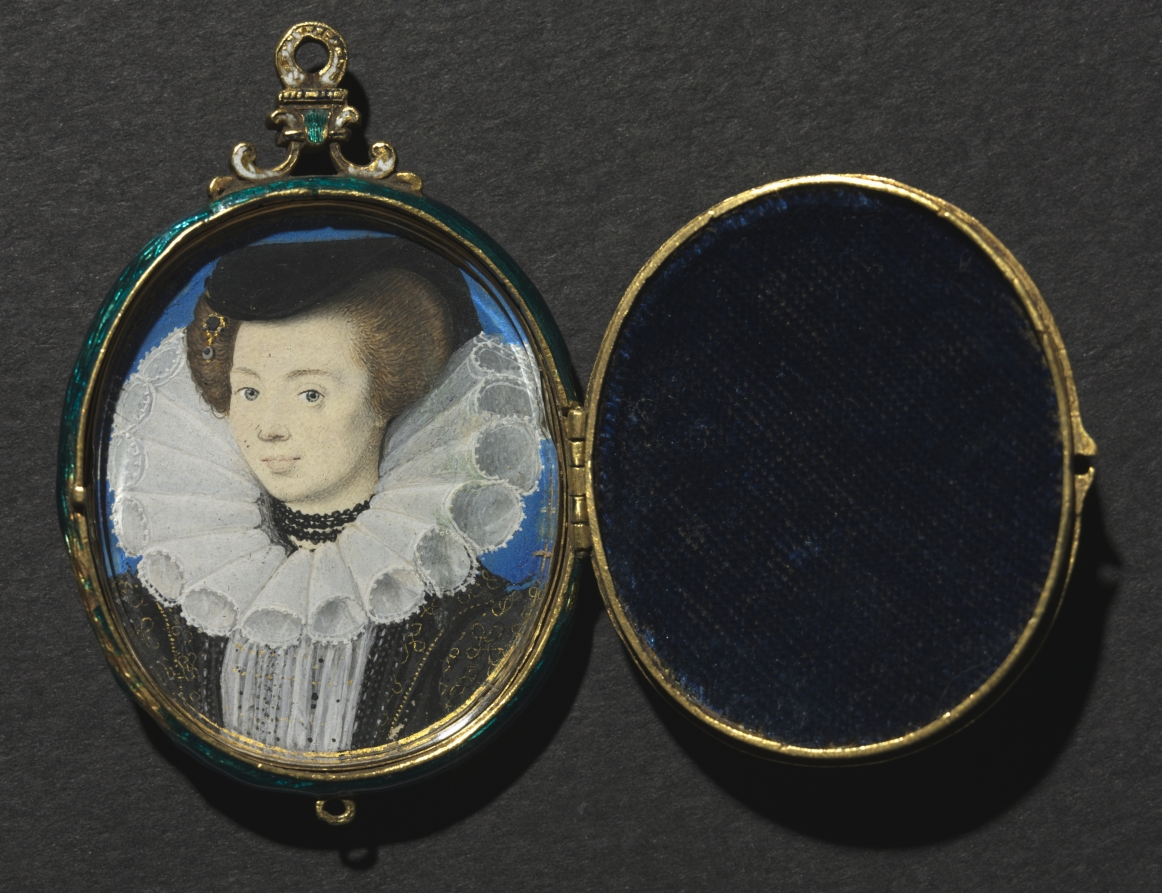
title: Portrait of a Woman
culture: England, 16th century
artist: Nicholas Hilliard (English, c. 1547–1619)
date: c. 1593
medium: watercolor on vellum in a gold and enamel locket frame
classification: Portrait Miniature